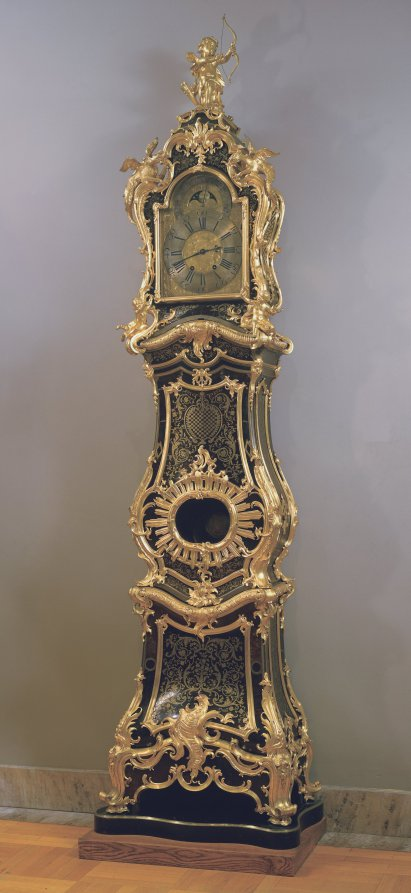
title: Tall- case Clock (Regulateur)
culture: France, Paris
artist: Jean-Pierre Latz (French, 1691–1754)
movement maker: Stollewerck (French)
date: 1744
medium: boulle marquetry with gilt bronze mounts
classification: Furniture and woodwork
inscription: incised on the back of the lowest front panel: .LATZ . A . PARISIIS . FECIT ./. MDCCXLIV; engraved on the clock face: Stollewerck/Paris.